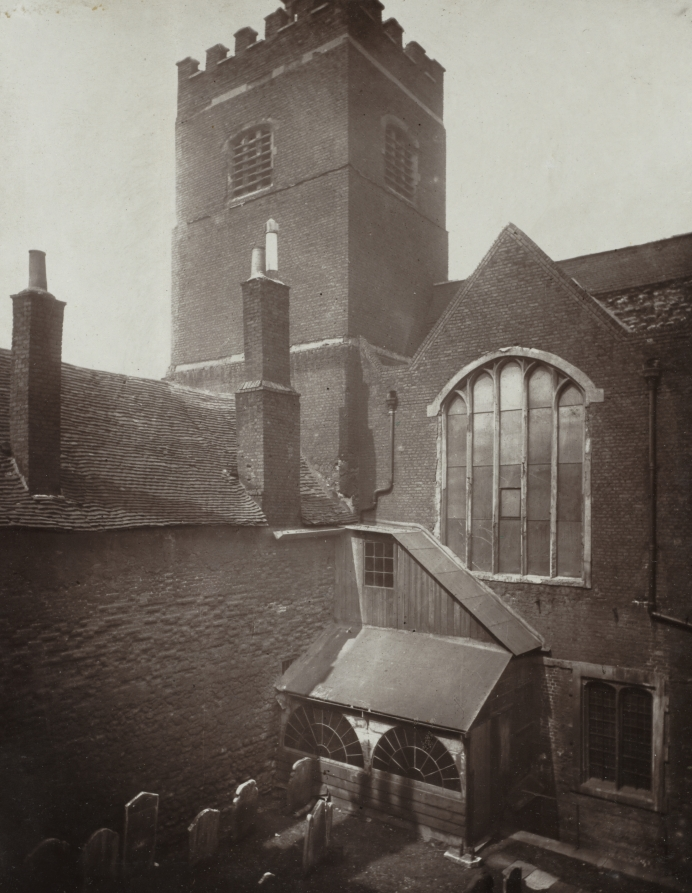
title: St. Bartholomews: The Green Churchyard on the Site of the Old South Transept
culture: England, 19th century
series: Old London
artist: Alfred H. Bool (British)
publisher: The Society for Photographing the Relics of Old London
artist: and John Bool (British)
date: 1877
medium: carbon print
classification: Photograph